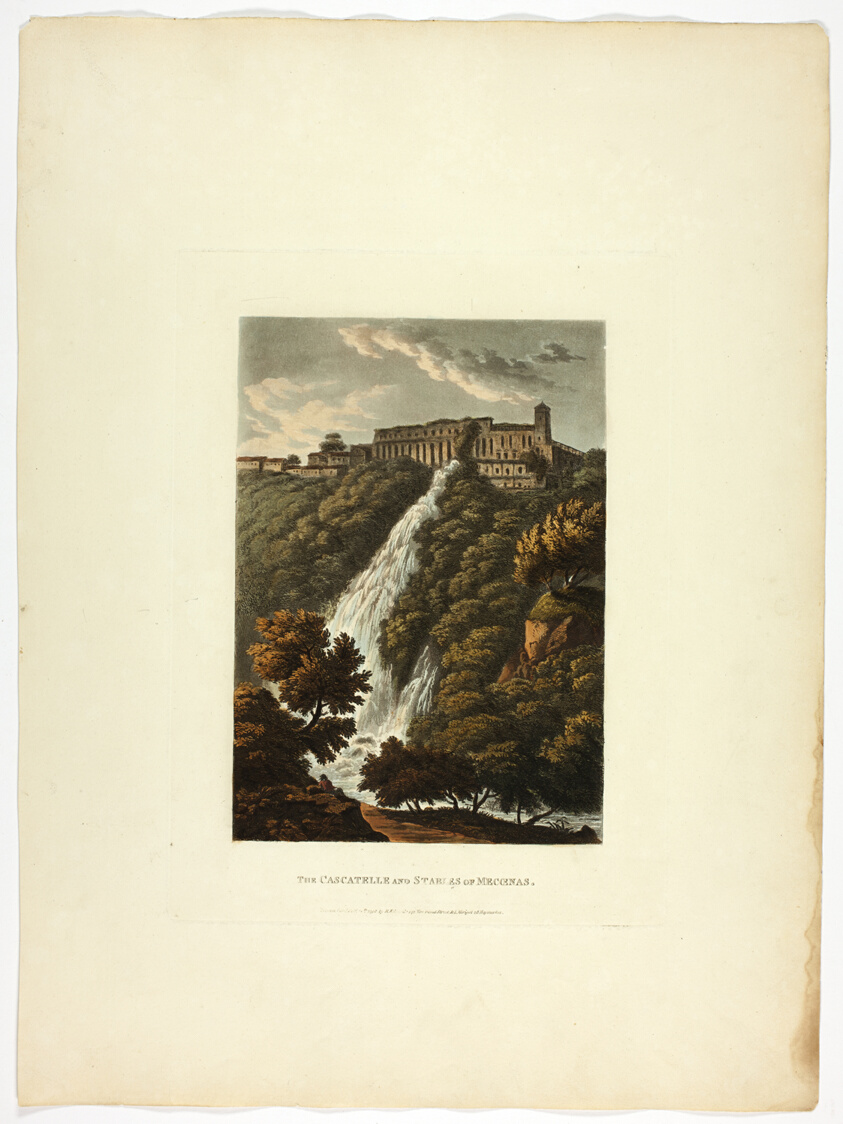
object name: Print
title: The Cascatelle and Stables of Mecenas, plate thirty-three from the Ruins of Rome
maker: M. Dubourg, (English, active 1786-1838); published by J. Merigot (Italian, Unknown)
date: published April 21, 1798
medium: Hand-colored aquatint on paper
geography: England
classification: aquatint; print; prints and drawing